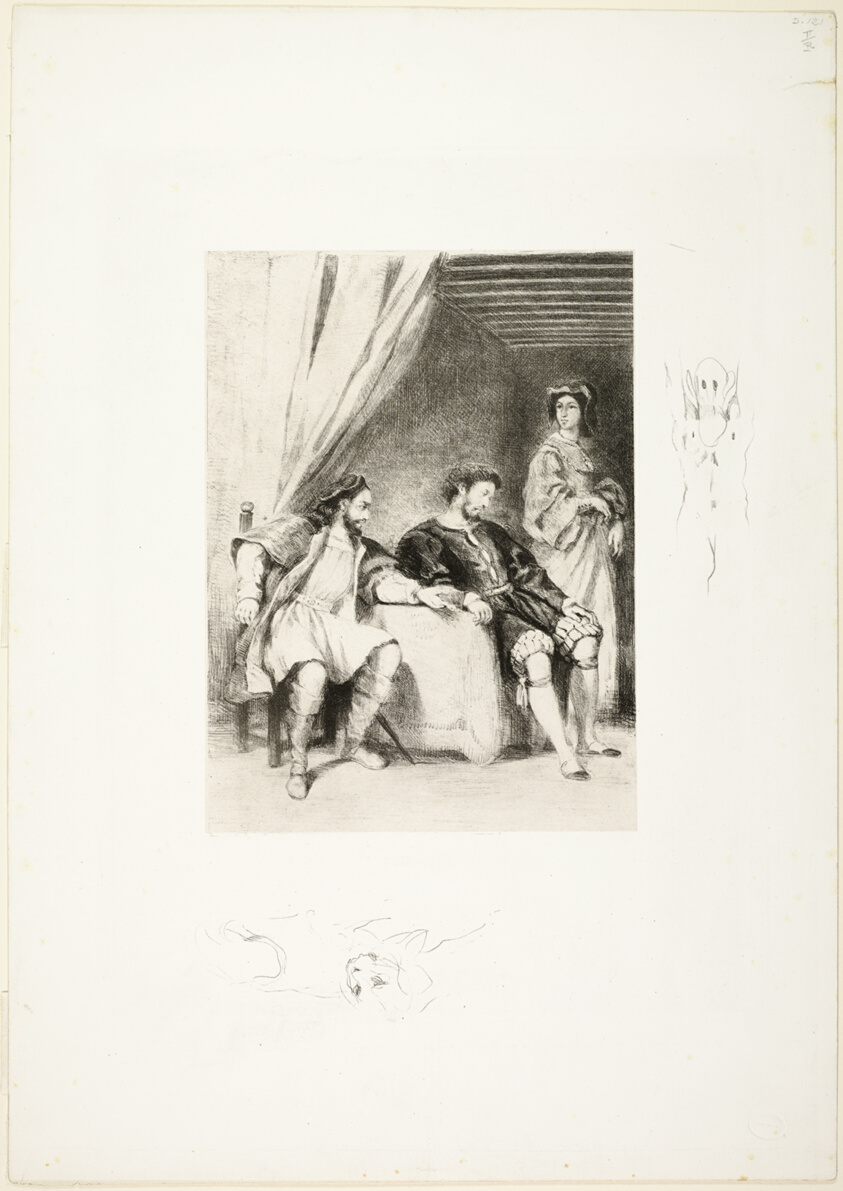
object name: Print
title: Weislingen Held Prisoner by Goetz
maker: Eugène Delacroix (French, 1798-1863)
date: 1821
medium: Lithograph in black on off-white China paper laid down on white wove paper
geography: France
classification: lithograph; print; prints and drawing